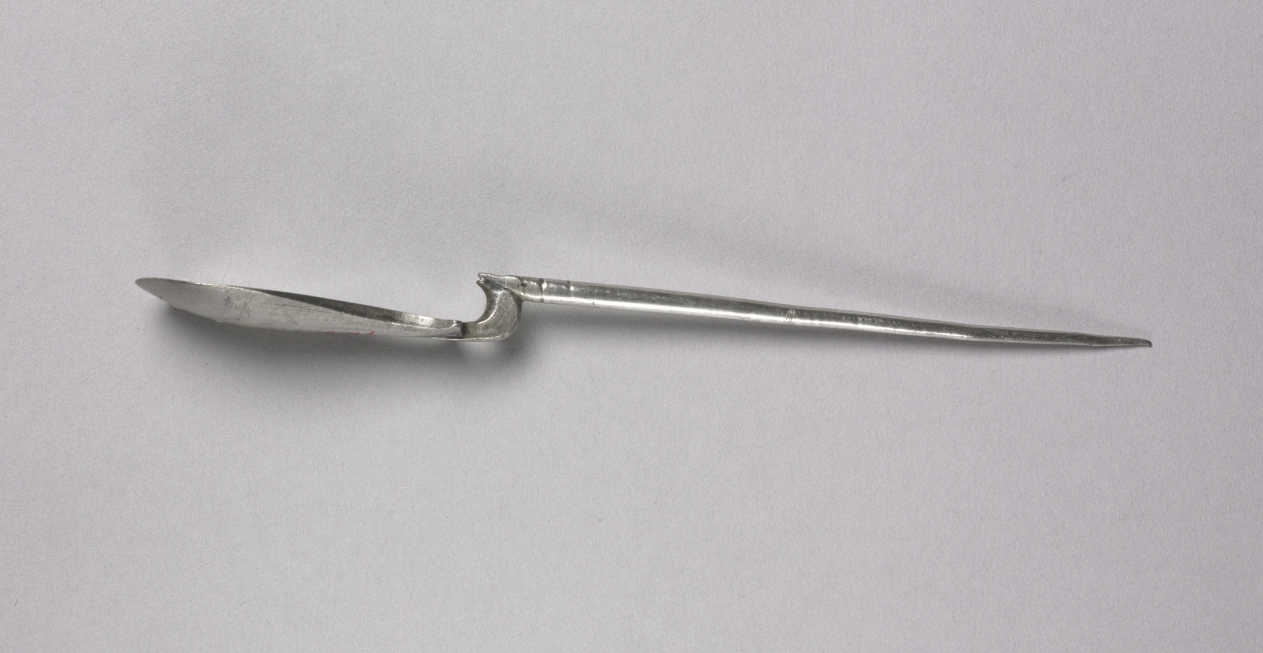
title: Spoon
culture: Byzantium, Syria(?), Byzantine period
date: 300s CE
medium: silver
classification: Metalwork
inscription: Greek inscription the center of the bowl.